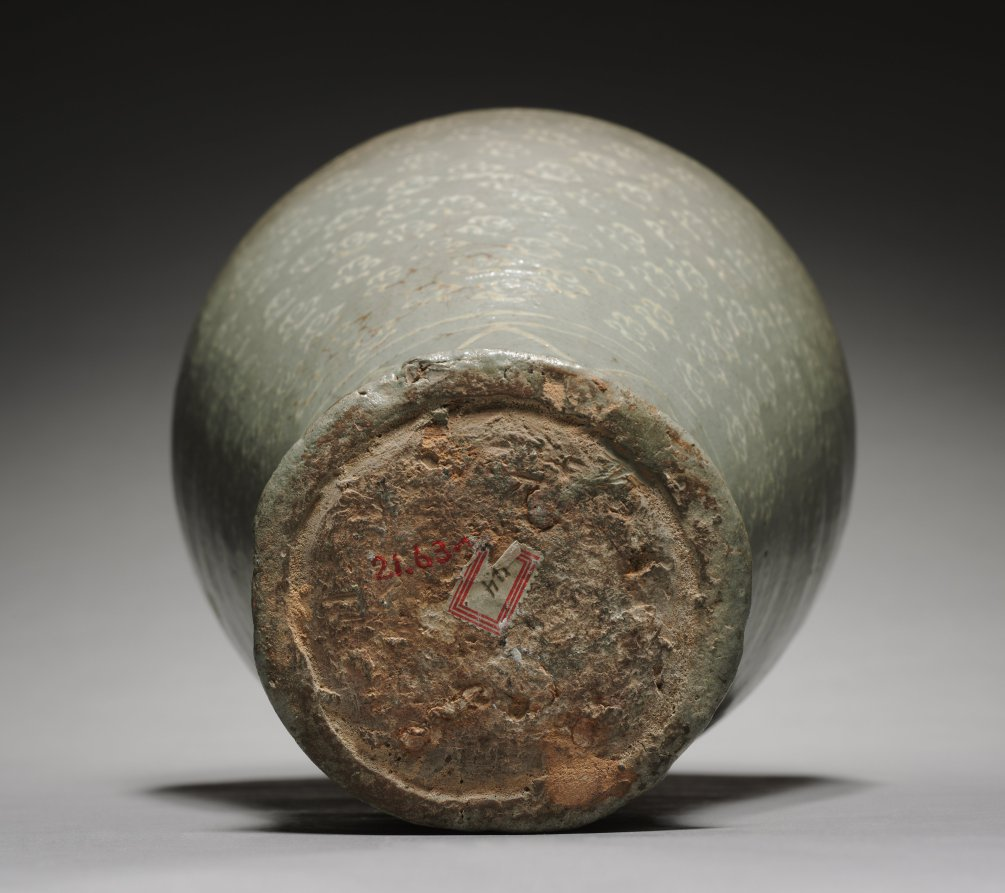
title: Prunus Vase with Inlaid Clouds and Flying Cranes Design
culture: Korea, Goryeo dynasty (918–1392)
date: 1300s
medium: celadon ware with inlaid white and black slip decoration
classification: Ceramic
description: As early as the seventh century, the practice of drinking tea and wine became an important part of elite culture in Korea. Once used to store alcoholic beverages, this type of vase features a wide body followed by a sharply rounded shoulder, a short neck and a small opening. Most of the remaining examples no longer have a lid, but originally it may have had a lid that not only covered the opening, but also served as a cup.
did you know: Prunus vases such as this one are often believed to contain a branch of plum blossoms, but recent research reveals that these lidded vases were also used to contain cooking liquid such as sesame oil.